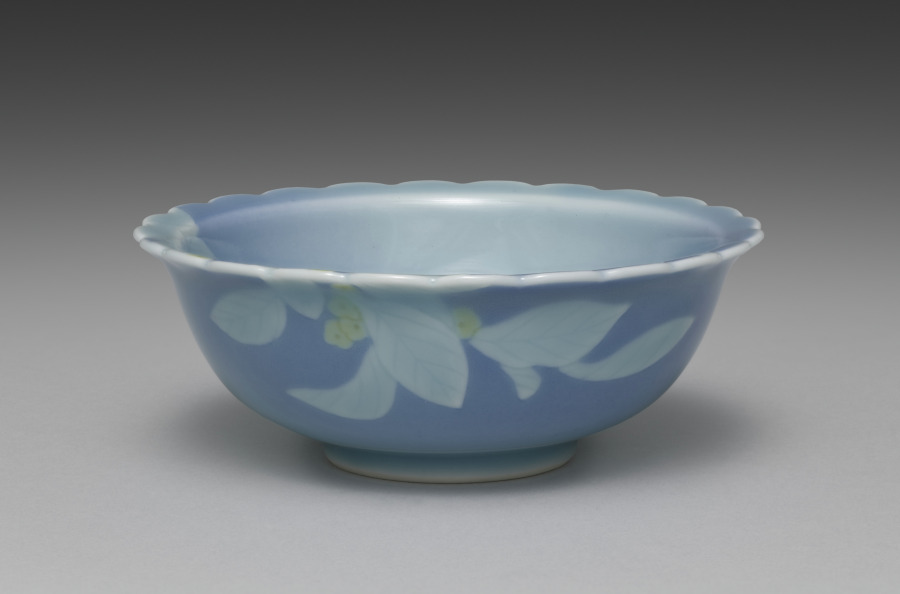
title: Dish from Dishes with Flowers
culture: Japan, Taishō period (1912–26) or Shōwa period (1926–89)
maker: Seifū Yohei IV (Japanese, 1872–1951)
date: 1914–46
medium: One from a set of five dishes; porcelain with underglaze yellow and blue glaze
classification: Ceramic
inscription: 清風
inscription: 清風造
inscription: 成山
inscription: 清風盧人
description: One can imagine a cool summer breeze when looking at this set of dishes, each shaped with a crenulated mouth and glazed with blue. Around the rim and into the basin, the bowls have low-relief designs of flowers with underglaze yellow petals; their leaves and stems show white through the glaze. On each dish, the design continues over the rim onto one side.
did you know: Seifū Yohei IV’s dishes with flowers feature underglaze yellow.